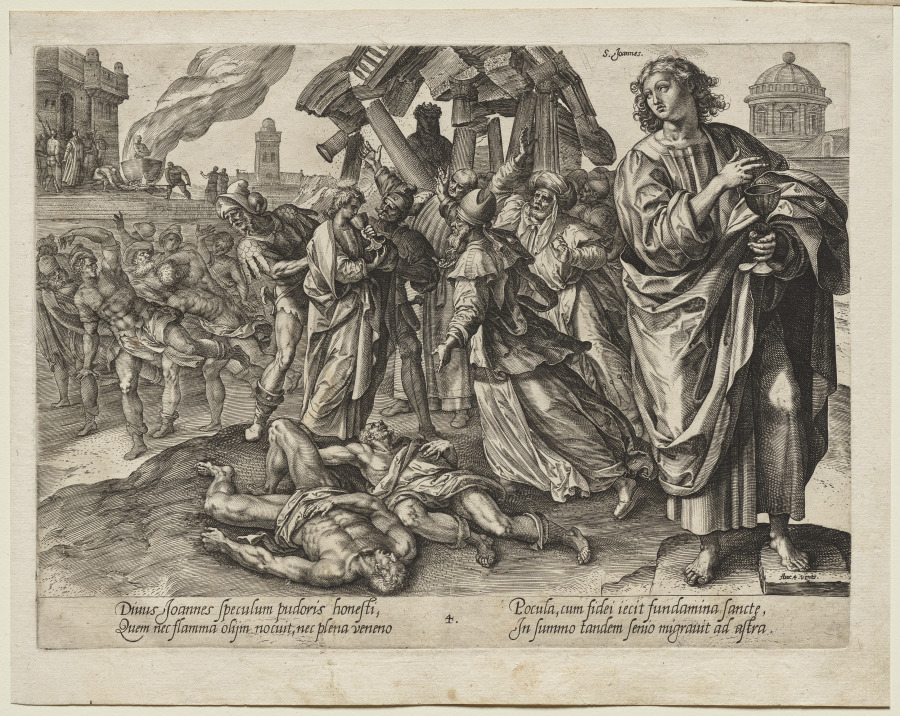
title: St. John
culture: Netherlands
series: Christ, St. Paul, and the Twelve Apostles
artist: Hendrick Goltzius (Dutch, 1558–1617)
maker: after Maarten de Vos (Flemish, 1532–1603)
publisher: Aux Quatre Vents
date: c. 1578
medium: engraving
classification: Print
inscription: Aux.4.vents. bottom right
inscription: Verses in lower margin: Diuus Joannes speculum…ad astra. Above head: S. Joannes. Numbered 4